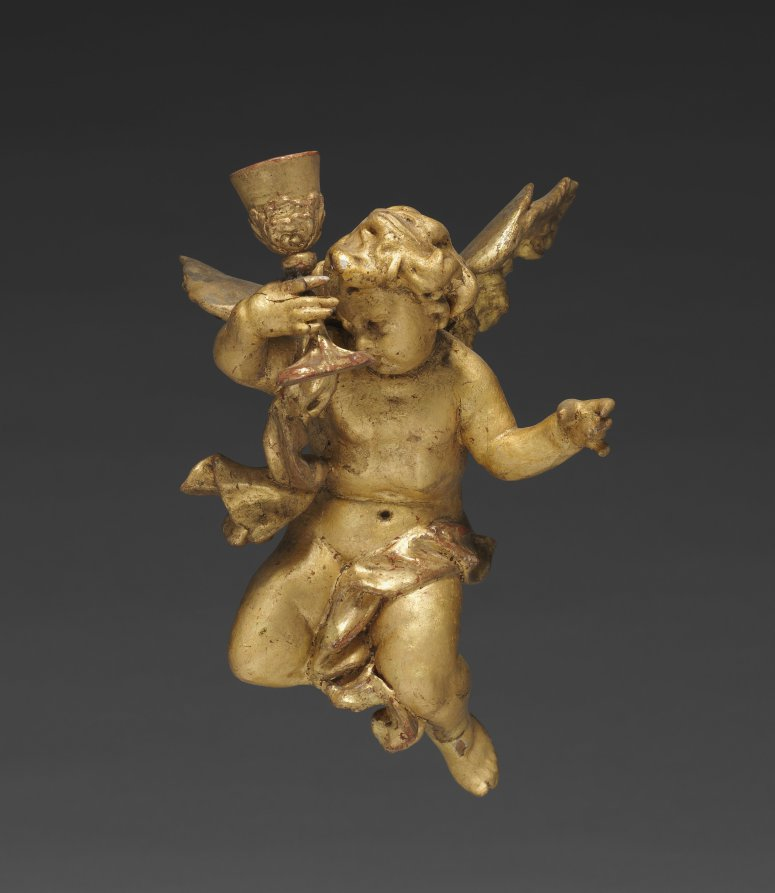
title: Altarpiece with Relics - Putto, middle right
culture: Germany, Bavaria, 18th century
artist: Joseph Matthias Götz (German, 1696–1760)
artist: and Workshop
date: c. 1735–40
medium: gilded wood, with relics in niches: gilded wood, mother-of-pearl, ebony, red silk, gold wire, seed pearls, rock crystal, pen and ink on paper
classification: Sculpture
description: Götz covers every surface in gold leaf, giving each part of the object equal importance, rather than simply framing a central picture. In this distinctively Central European approach, figural narrative is subordinate to the overall ensemble. Götz designed this object to rest on top of an altar, probably in front of a larger painted or sculpted decorative scheme. The work contains relics seen through the small windows on the perimeter. These small remains of holy figures demonstrate the persistence of a medieval Catholic tradition well into the 1700s.